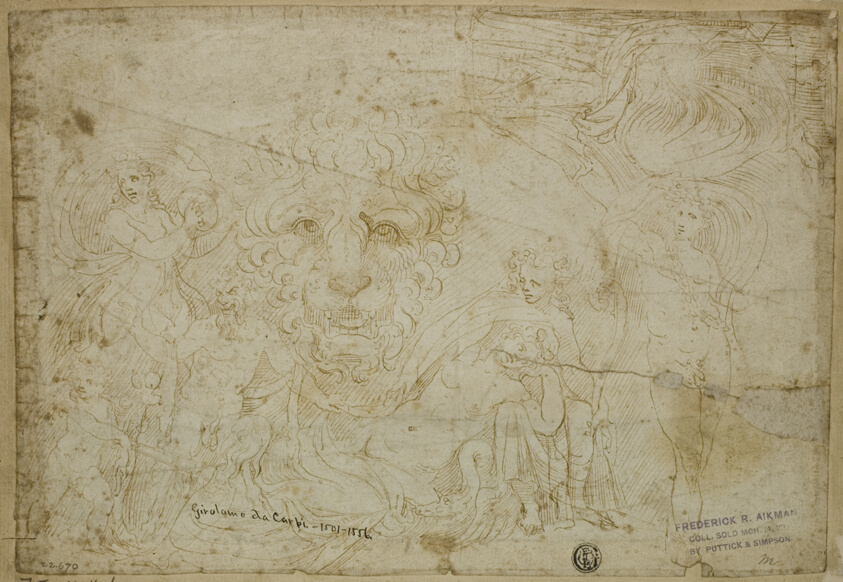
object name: Drawing and Watercolor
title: Blenheim Palace Sarcophagus: Bacchanale with Lion's Head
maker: Girolamo Sellari, called Girolamo da Carpi; Italian, 1501-1556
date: 1549/53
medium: Pen and brown ink on ivory laid paper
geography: Italy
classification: pen and ink drawings; drawings (visual works); prints and drawing